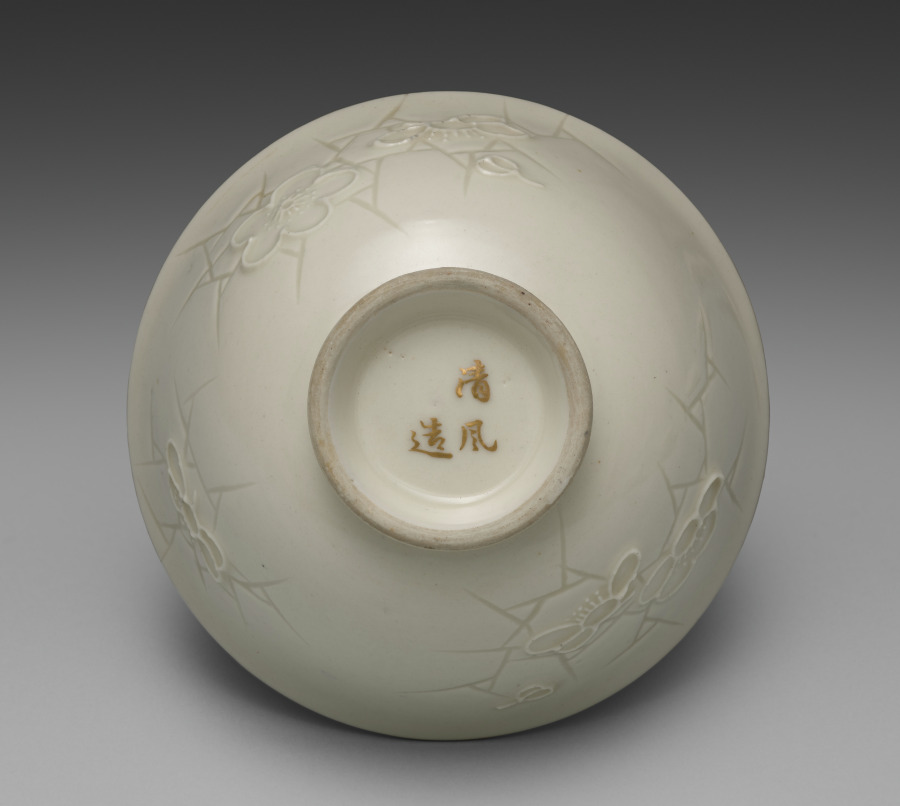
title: Bowl from Dining Set with Plum Blossoms and Cracked-Ice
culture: Japan, Meiji period (1868–1912)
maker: Seifū Yohei II (Japanese, 1844–1878)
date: c. 1875–78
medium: Porcelain with molded designs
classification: Ceramic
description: Each item in this set has a delicate low-relief design of flowering plum branches over scattered, intersecting lines meant to resemble the cracked-ice surface of a frozen body of water and is signed on the base in gold pigment. While Yohei II produced many fine works in underglaze blue, like those produced by Kiyomizu Shichibei, he also made works in quite different styles later in his career, from the early 1870 s. In 1873, he was appointed purveyor to the Industrial Center of Kyoto Prefecture, a designation associated with Kyoto’s efforts to reach an international market through the port of Kobe; and from 1875 until his death, he was involved in national-level projects to present Japanese ceramics across the world. It was during this period that Yohei III was apprenticed to Yohei II, and it has been suggested that this set may in fact be an early example of Yohei III’s work, which he signed with his teacher’s name. Decorated with flowers resembling Japanese textile motifs, the set calls to mind the design of Yohei II’s pair of vases with plum blossoms in the Victoria and Albert Museum. Here, the elaborate trees created for a formal public exhibition setting have been translated into the approachable blossoms of the genteel domestic environment. While the designs are consistent across the pieces, each raised flower petal and pistil and each incised line in the ice was done by hand, so the cups, bowls, and dishes are similar yet unique. The bottoms of two boxes once identified the set’s owner, but the information has been deliberately obscured with black ink. However, inscriptions still visible appear to indicate two occasions, once at the end of July 1886 , and once again in June 1916 , when parts of the set were requested from Hokura in Niigata Prefecture. The location corresponds to a neighborhood in the present-day city of Jōetsu. The surname Tsuji 辻 also appears on a paper tag affixed to one of the box cloths. Future research may possibly reveal more about their provenance. A vase by Yohei III in a private collection combines the formal grandeur of the Yohei II vases in the Victoria and Albert Museum with the gentler design of this dining set, placing flowering plum trees against soft, scalloped-edge clouds resembling those in golden screens.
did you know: The dining wares have a creamy white coloration that the four boxes containing them identify as Korean in style.